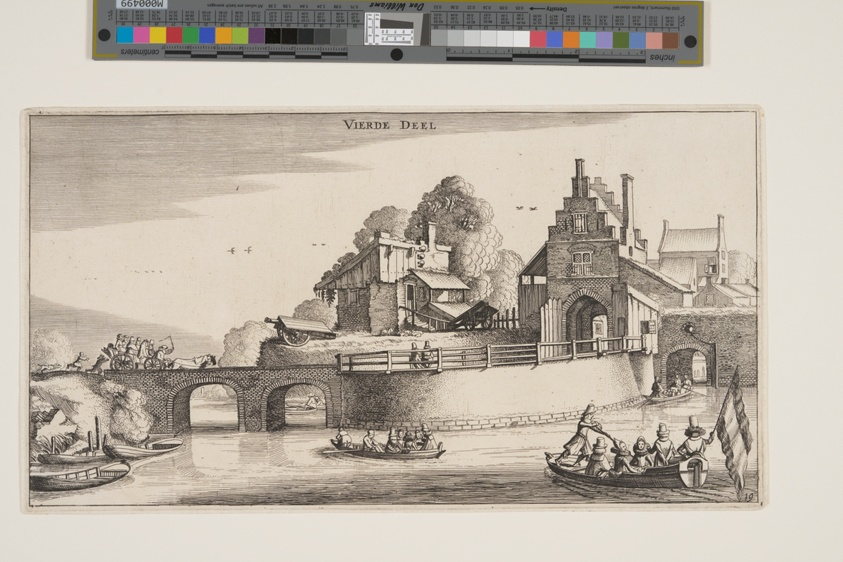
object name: Print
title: Entrance of a Town, from Landscapes (Playsante Lantschappen)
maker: Attributed to Claes Jansz. Visscher II (Dutch, 1586-1652); after Jan van de Velde II (Dutch, c. 1593-1641)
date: c. 1641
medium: Etching, with engraving, on ivory laid paper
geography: Netherlands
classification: etching; paper; print; prints and drawing